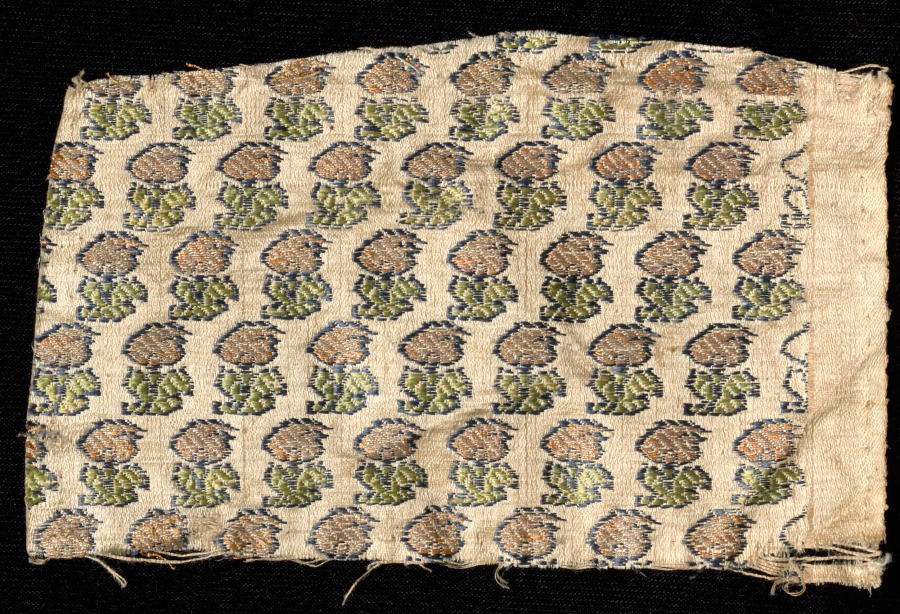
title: Fragment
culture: India, 19th century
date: 1800s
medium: brocade; silk and metal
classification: Textile